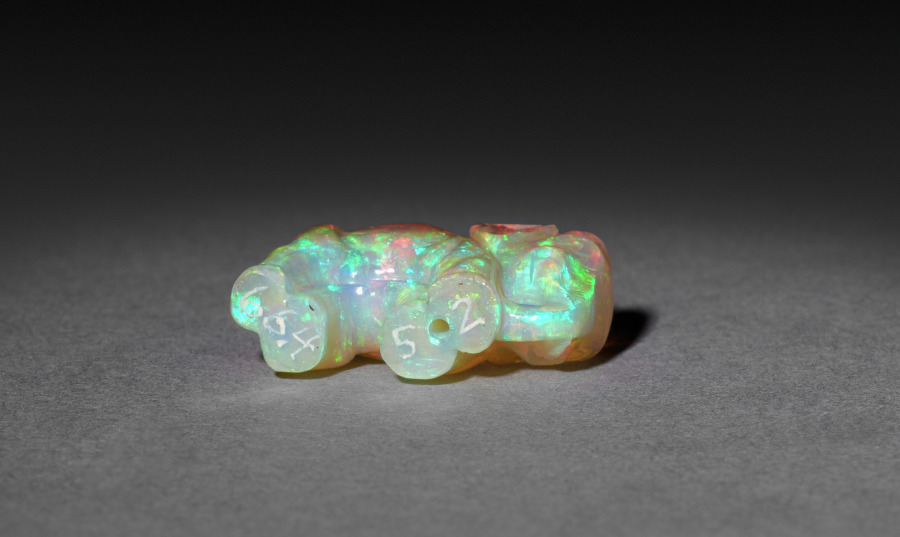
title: Elephant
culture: Russia, St. Petersburg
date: late 1800s-early 1900s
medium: opal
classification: Miscellaneous